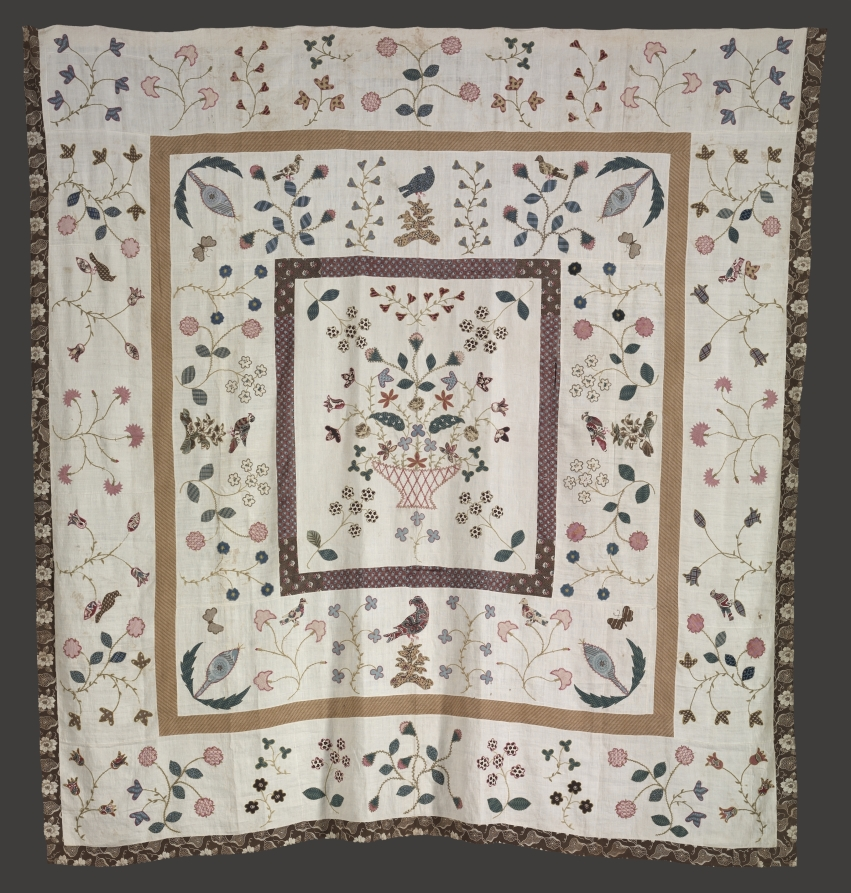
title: Bedspread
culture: Canada, Mid 19th century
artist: Belinda Ellen Orr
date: c. 1840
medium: embroidered linen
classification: Textile